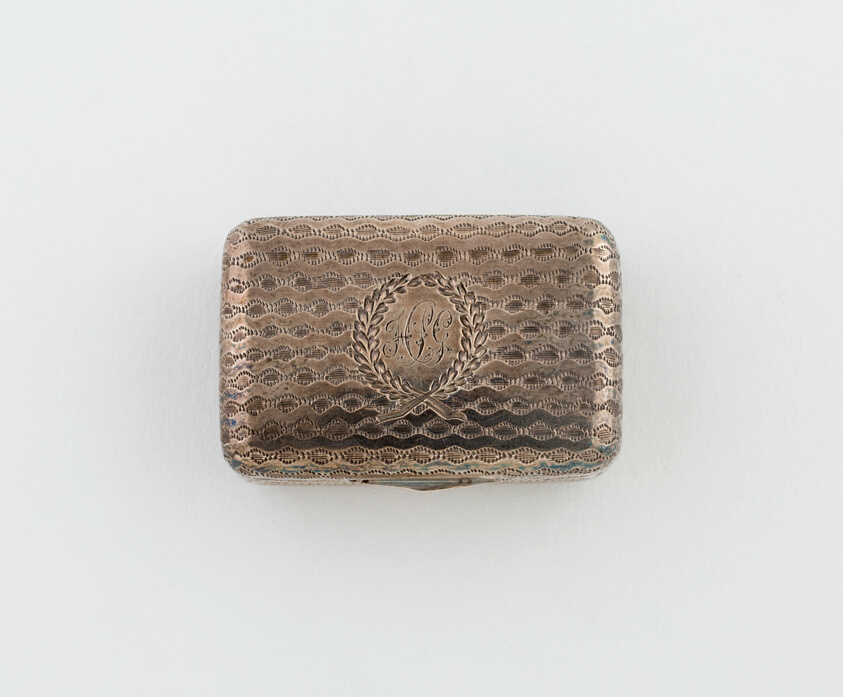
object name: Metalwork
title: Vinaigrette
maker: Possibly William Kingdon or William Eley; London, England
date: c. 1810/11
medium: Silver and silver gilt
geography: London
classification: container for personal use; vinaigrette (container for health care); european decorative arts; metalwork; silver; decorative object/ornament